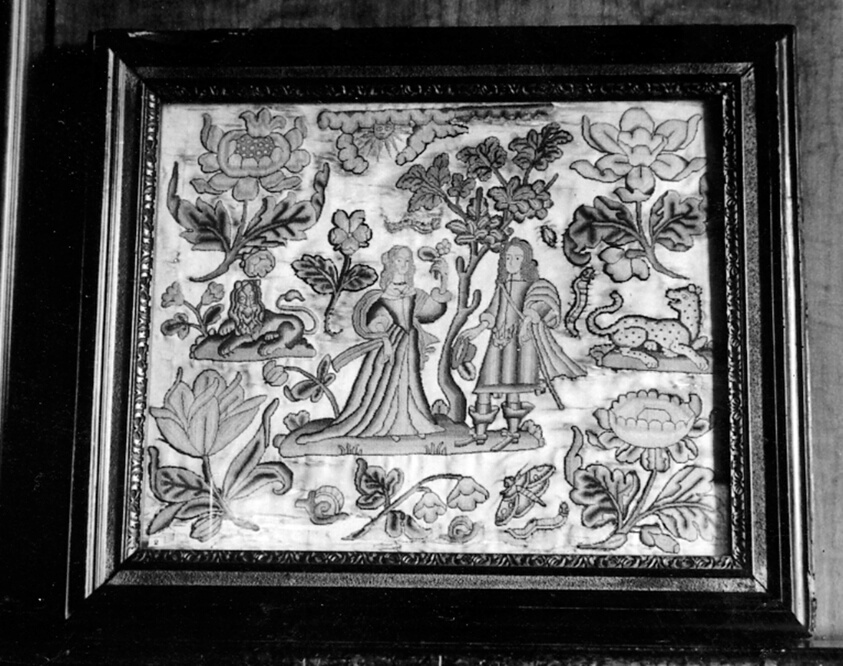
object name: Textile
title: Picture (Depicting William and Mary)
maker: England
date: c. 1869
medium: Silk, satin weave; embroidered with silk in tent stitch; appliquéd; wooden frame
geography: England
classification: textile; needlework (visual works)